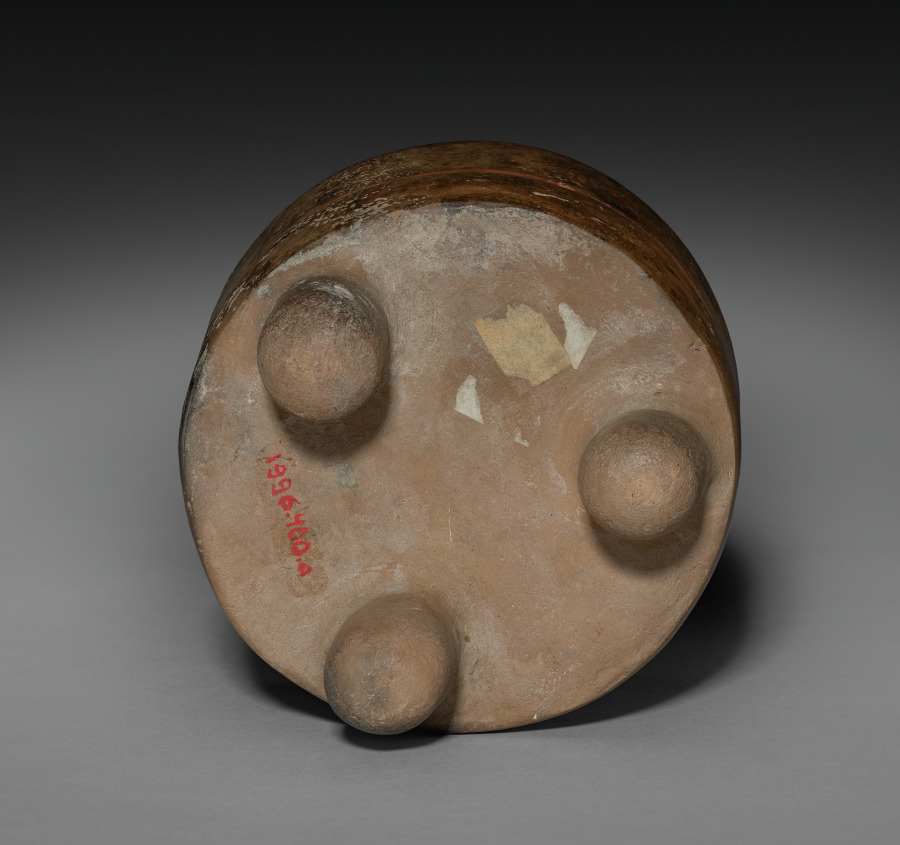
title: Tripod Vessel with Lid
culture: Mexico or Central America, Maya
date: 250–600 CE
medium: earthenware with pigment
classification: Ceramic